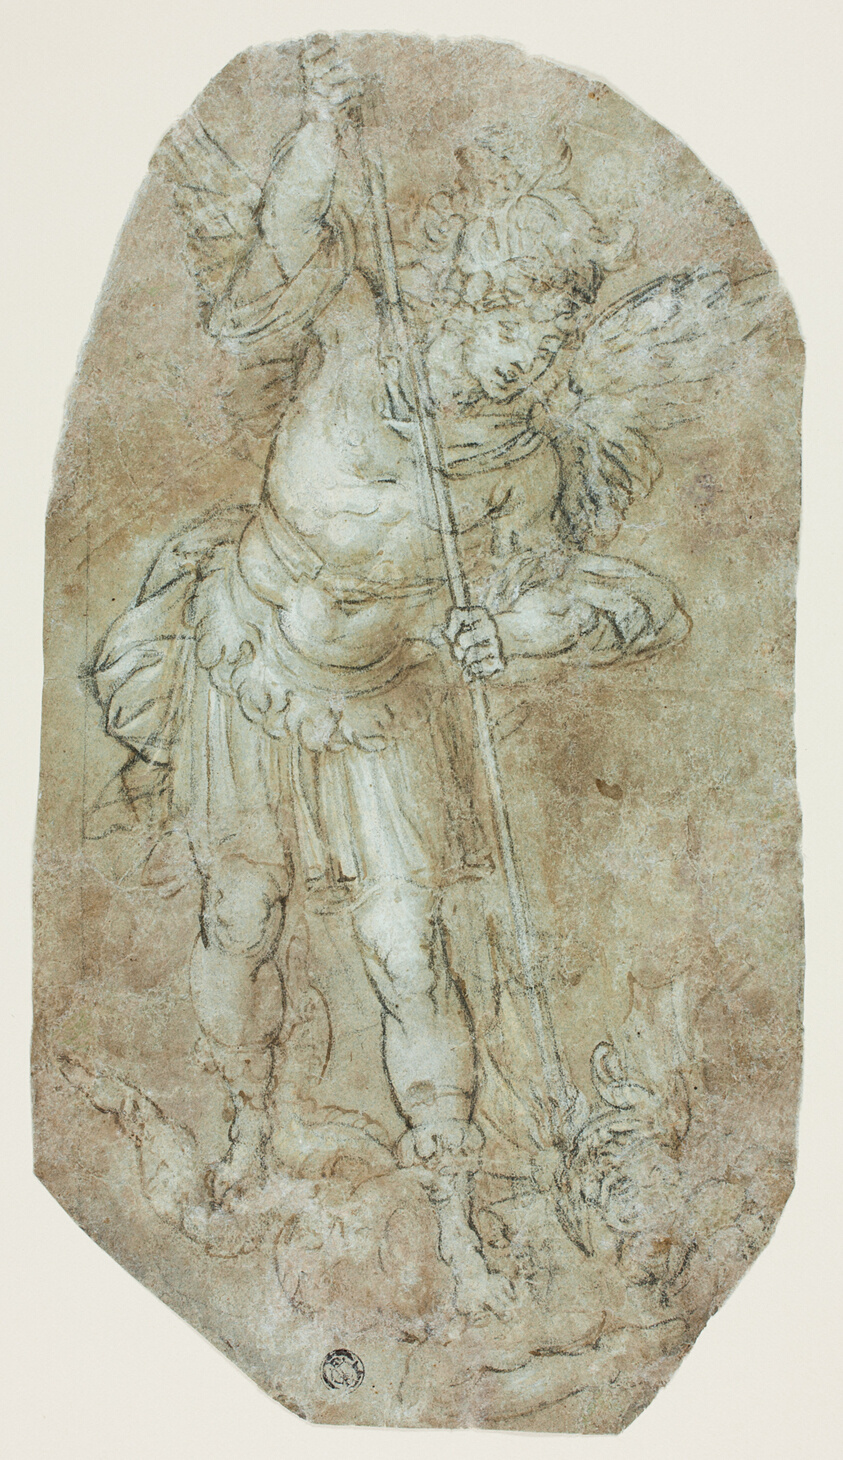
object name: Drawing and Watercolor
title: St. Michael Archangel and the Devil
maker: After Guido Reni; Italian, 1575-1642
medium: Pen and brown ink and brush and brown wash, heightened with lead white (discolored), over black chalk, on blue laid paper, laid down on cream wove paper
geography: Italy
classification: pen and ink drawings; drawings (visual works); prints and drawing